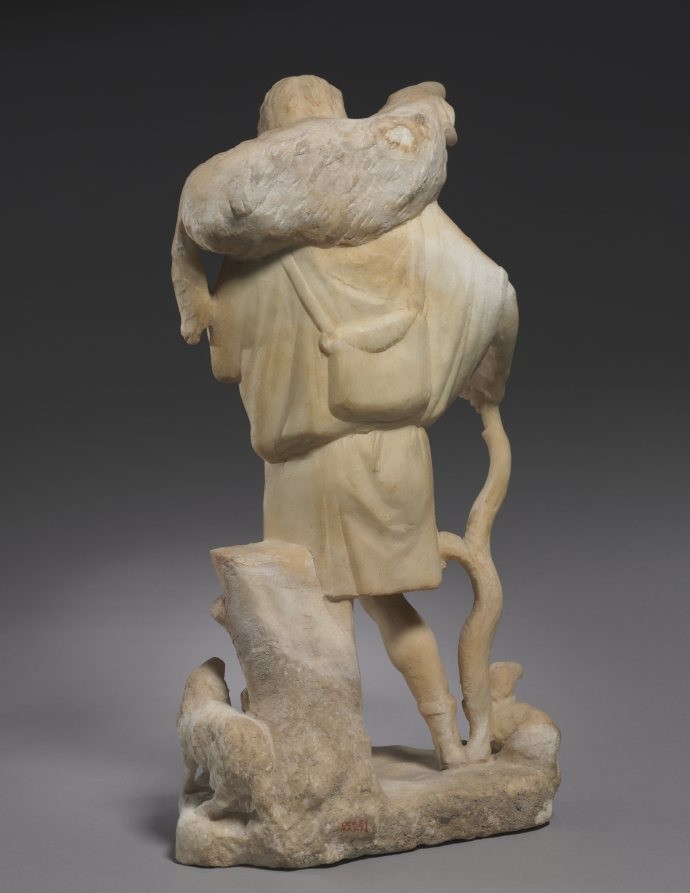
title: The Good Shepherd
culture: Anatolia, late Roman-early Christian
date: 280–90 CE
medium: marble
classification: Sculpture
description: Images of a youthful shepherd standing among his flock and carrying a sheep over his shoulders were popular with Romans of traditional faith as well as Christians living in the Late Roman Empire. Painted on the walls or the ceiling of a burial chamber or carved on a marble sarcophagus, this image might simply invoke the deceased’s hope for a peaceful afterlife spent in a pastoral setting. For Christians, this traditional Roman image took on a more specific meaning. It could be understood to refer to the passage in the Gospel according to John in which Christ said of himself: "I am the good shepherd. The good shepherd lays down his life for the sheep." (John 10:11). Allegedly found together with the Jonah statuettes, it is indeed likely that this figure represents Christ as the Good Shepherd.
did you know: This youthful shepherd appears serene while bearing a large sheep on his broad shoulders. He looks untaxed by this effort and his calm presence seems to put the small sheep at ease, as they frolic at his feet. Since this sculpture was found together with the four Jonah statuettes, it is likely this figure depicts Christ as the Good Shepherd.